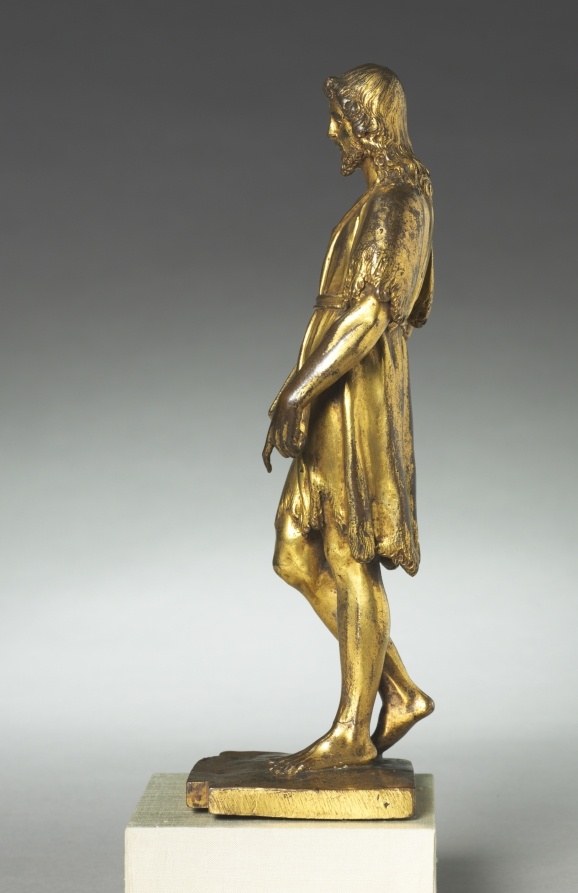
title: Saint John the Baptist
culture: Italy, Venice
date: c. 1550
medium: gilt bronze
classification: Sculpture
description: This small bronze, covered with gold, was produced in multiple versions. Saint John stands here, looking calm and composed, in a rather graceful pose. This piece has a sense of forward motion even though the figure appears to be leaning back in this stance. Elegant and subtle, this piece is a beautiful example of small cast Renaissance bronzes.